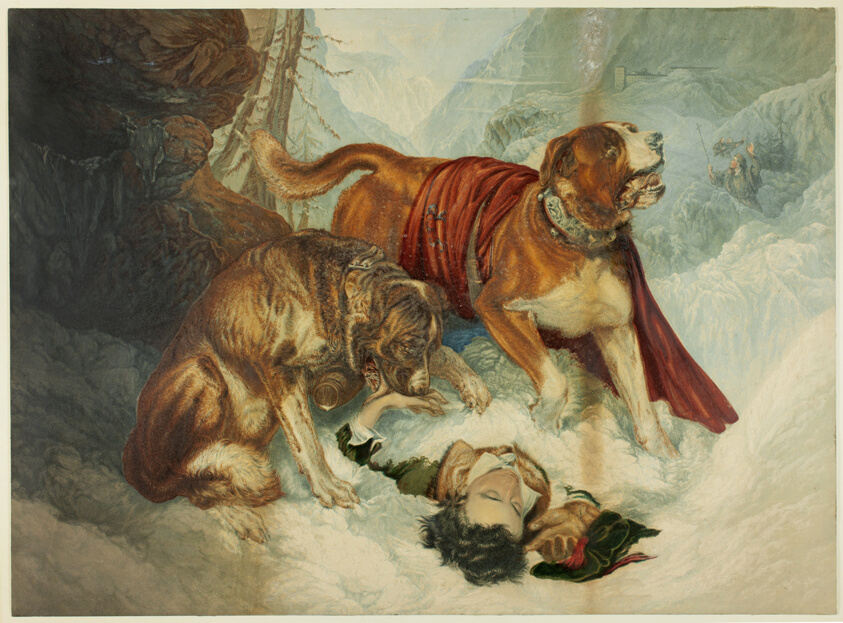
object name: Print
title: The Dogs of St. Bernard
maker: George Baxter (English, 1804-1867)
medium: Steel engraving colored with wooden blocks on paper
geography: England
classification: wood engraving; print; prints and drawing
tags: dogs, animals